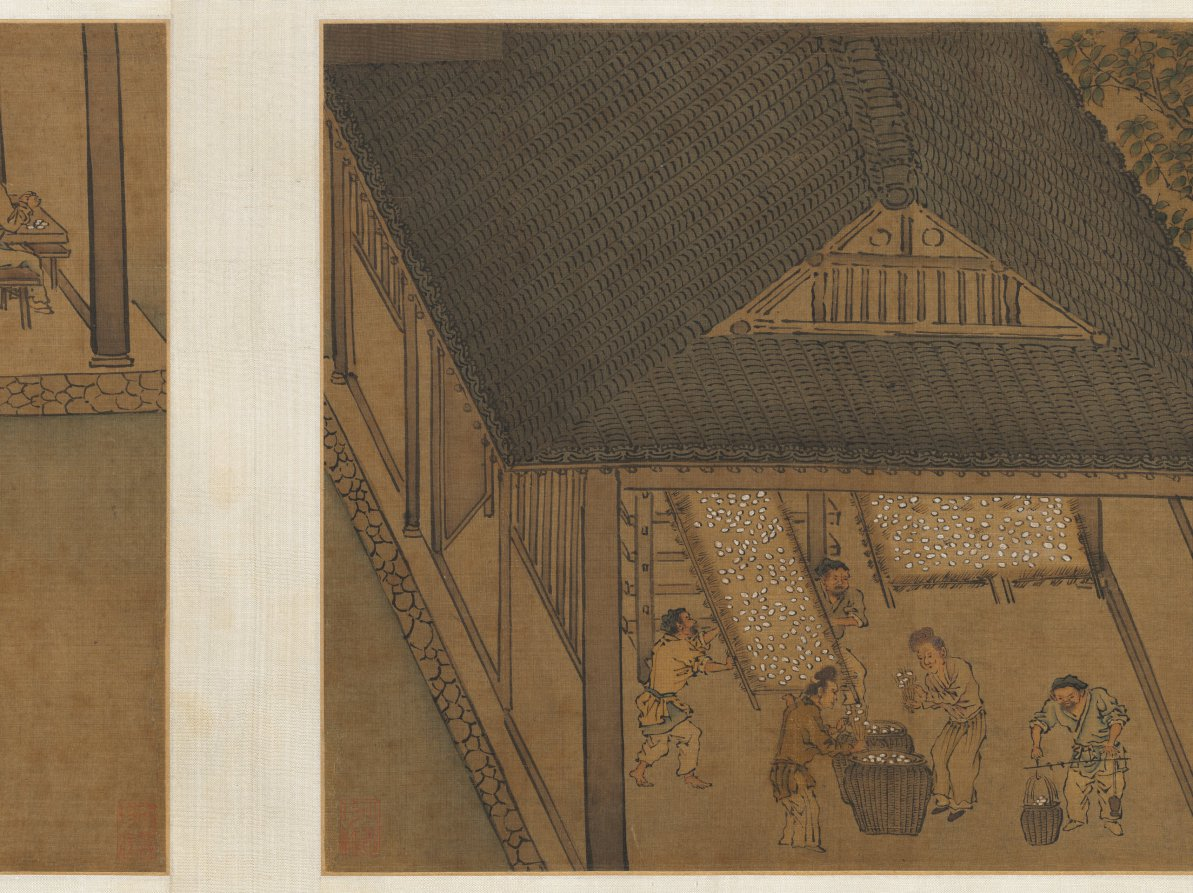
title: Sericulture (The Process of Making Silk)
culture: China, Southern Song dynasty (1127-1279)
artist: attributed to Liang Kai (Chinese, mid-1100s–early 1200s)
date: early 1200s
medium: Handscroll; ink and color on silk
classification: Painting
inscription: 3 colophons and 7 seals of Ch'eng Ch'i (20th c.).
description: By the Southern Song period, the economic center of the silk industry had shifted to the lower Yangzi delta, while the north continued to be troubled by wars. Divided into three sections, the handscroll illustrates 14 steps in the process of making silk, from the raising of silkworms to the weaving of silk cloth. The scroll’s scenes follow the illustrations of Lou Shou’s (1090–1162) Pictures of Tilling and Weaving (gengzhi tu), the first recorded painting of this genre, which was conceived in Hangzhou around 1145. However, in the Cleveland painting the artist groups several scenes of sericulture together under the roof of an open structure.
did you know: The painting is attributed to Liang Kai, a court artist active from about 1201 to 1204 at the Imperial Painting Academy in the city of Hangzhou, a major silk weaving center from that time to the present day.